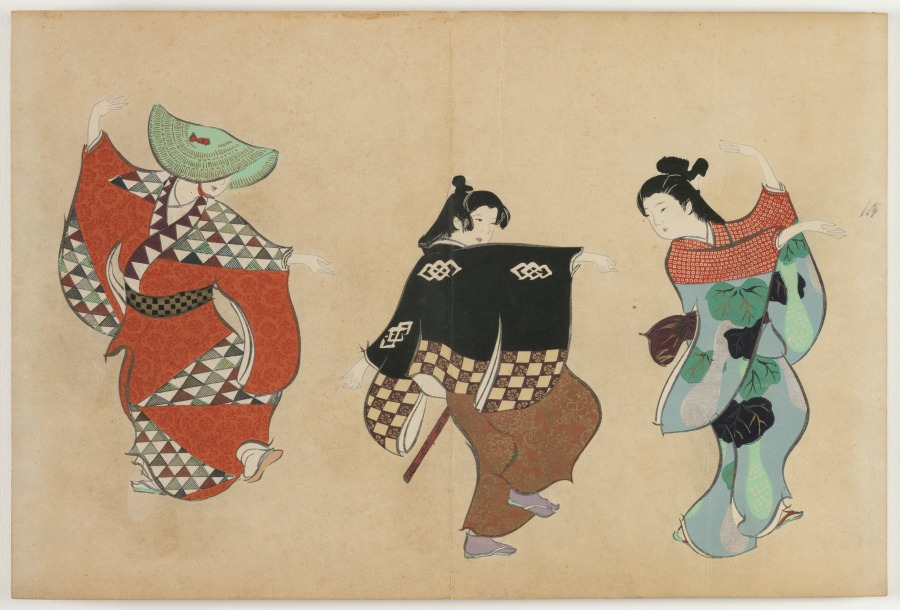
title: Flowers of a Hundred Worlds (Momoyogusa): Dancing (Odori)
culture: Japan, Meiji period (1868–1912)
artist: Kamisaka Sekka (Japanese, 1866–1942)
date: 1909–10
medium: color woodcuts with gold and silver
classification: Bound Volume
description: This print from a set of three woodblock printed albums displays the graphic design prowess of Kamisaka Sekka. The images were first distributed one by one to subscribers to the series but later were reissued in bound form, like this book, for mass consumers. Each print features a vignette taken from nature or Japanese literature. Many of the scenes have a long history in Japan, originating in the 900s or 1000s and having been interpreted by all manner of artists since that time. Sekka’s selections hew closely to precedents from the Rinpa style originated by painter Tawaraya Sōtatsu (c. 1570–c. 1640) and calligrapher Hon’ami Kōetsu (1558–1637).